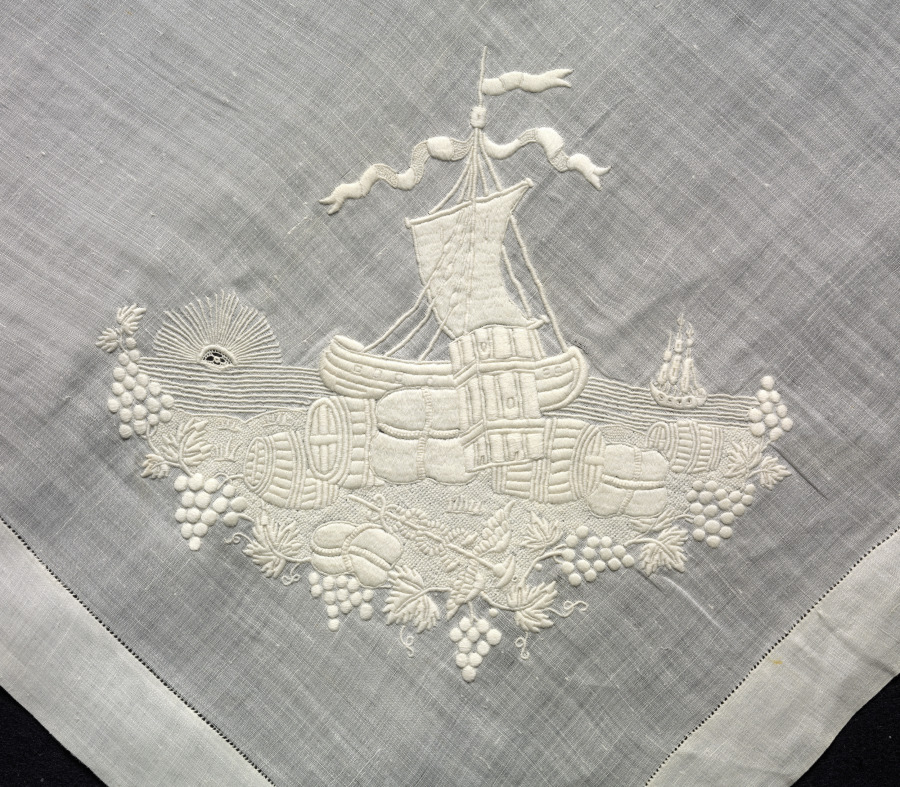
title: Embroidered Handkerchief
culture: Italy(?)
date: 1800s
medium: Plain weave linen, embroidered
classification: Embroidery